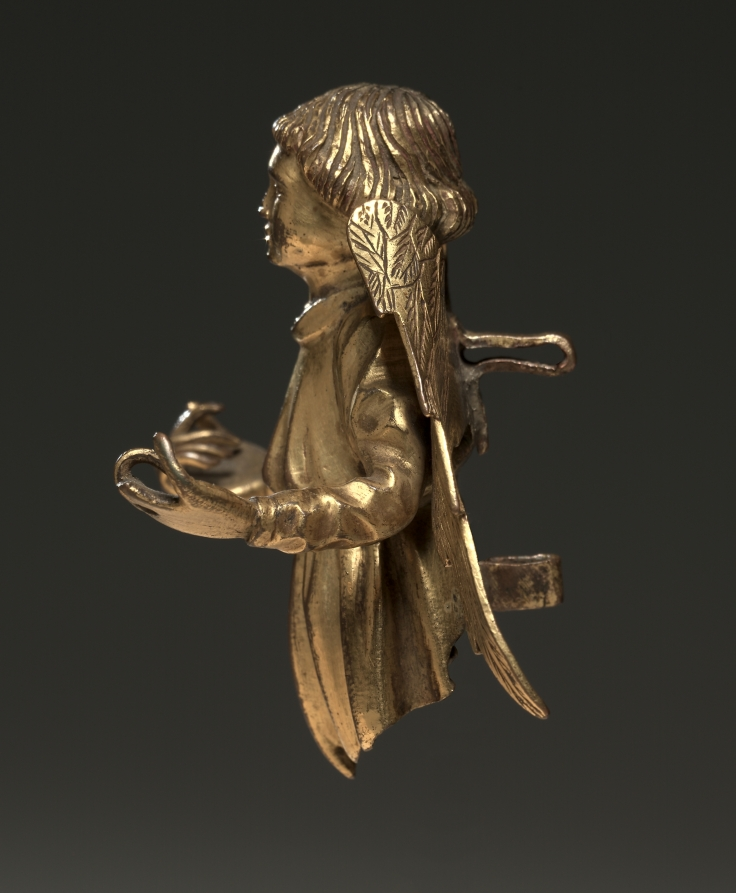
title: Angel from an Architectural Reliquary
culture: Franco-Netherlands or Paris, 15th century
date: c. 1400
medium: gilt bronze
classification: Sculpture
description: This beautiful Gothic angel is probably a surviving element from a large architectural reliquary. The last clue to its lost context disappeared when the symbolic attribute was twisted from the angel’s fingers, possibly during the destructive zeal of the French Revolution. The technique and style are characteristic of the lay workshops employed by the Valois courts during the early 1400s.